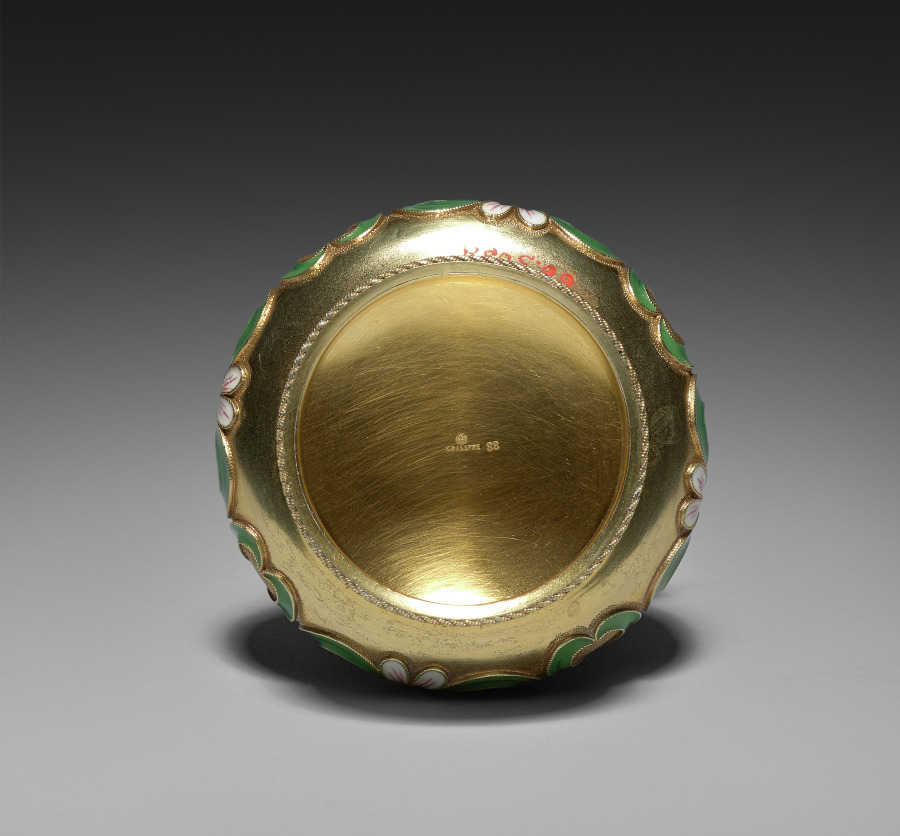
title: Cover for a Tea Caddy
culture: Russia, St. Petersburg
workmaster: attributed to Feodor Ivanovich Rückert (Russian, 1840–1917)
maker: House of Fabergé (Russian, 1842–1918)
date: 1896–1906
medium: silver gilt, opaque cloisonné enamel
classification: Miscellaneous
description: Fabergé’s craftsmen in Moscow, especially under the watchful eye of workmaster Feodor Rückert, became known for their work in the Pan-Slavic or Neo-Russian style, hearkening back to 17th-century motifs of Russian folk art. Often on rather conventional shapes, Rückert and his silversmiths created an explosion of color, achieved through the historic technique of cloisonné enamel in which tiny metal lines are soldered to the surface then filled with glass powders in various colors and fired to create a high gloss finish. The result is a spectacular evocation of the 17th-century originals. Far from mere copies, however, Rückert's designs, such as this tea service, employ naturalistic or abstract motifs in a thoroughly modern adaptation of a remarkable earlier period of Russian art and decoration.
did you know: This cover for a tea caddy is part of a larger tea service.